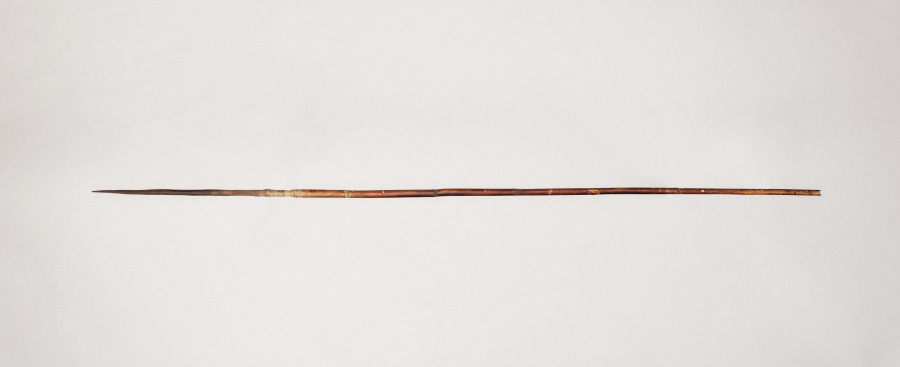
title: Arrow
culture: Philippines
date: before 1922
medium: reed shaft, iron tip attached with strips of bamboo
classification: Arms and Armor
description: This straight, lightweight arrow shaft is made from a single length of bamboo. Its surface is smooth and undecorated, with slight natural tapering toward the point. Shallow notches are cut at the rear end for attaching the bowstring.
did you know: The Aeta people typically used arrows like this one for hunting small game and birds.